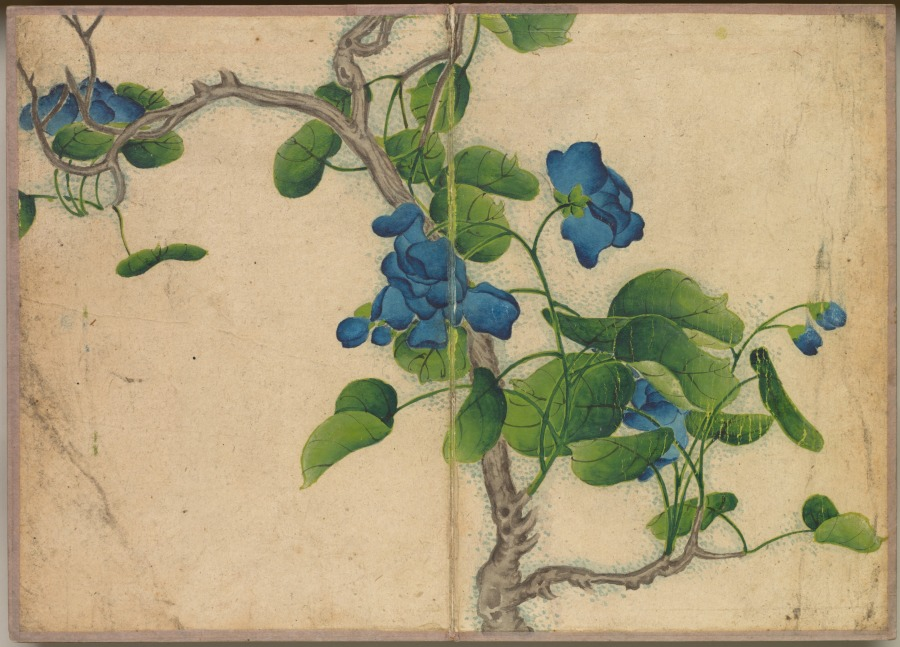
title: Desk Album: Flower and Bird Paintings (Climbing Blue Flowers)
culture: China, Qing dynasty (1644-1911)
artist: Zhang Ruoai (Chinese, 1713–1746)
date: 1700s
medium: album leaf, ink and color on paper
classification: Painting